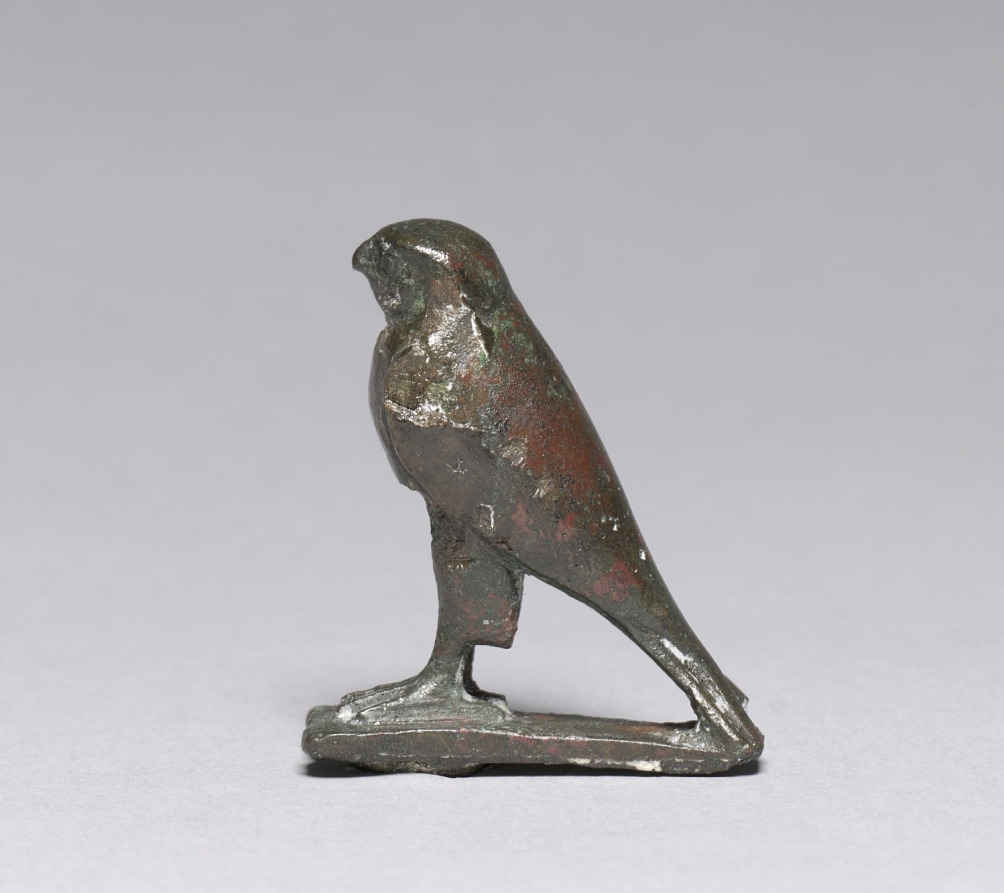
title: Horus Falcon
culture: Egypt, Late period (715–332 BCE), Dynasty 26 or later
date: 664–30 BCE OR 664–330 BCE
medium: bronze, solid cast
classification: Sculpture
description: The falcon stands in hieroglyphic form—body erect, feet together—on a thin, oblong base with a tang beneath. The eye and beak are the only areas with incised details. Numerous such images of this important bird, an age-old symbol of Egyptian kingship, survive.